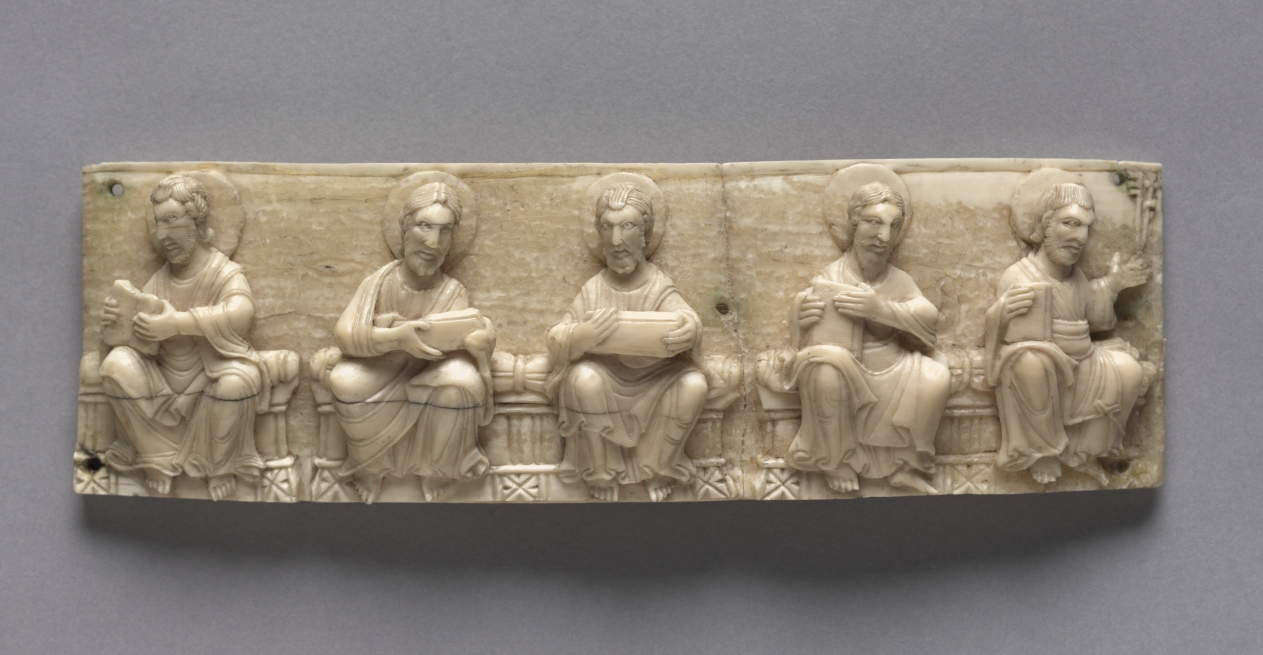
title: Plaque from a Portable Altar Showing Christ and the Apostles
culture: Germany, Lower Rhine Valley, Romanesque period, 11th century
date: 1050–1100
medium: walrus ivory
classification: Ivory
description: This intricately carved ivory panel once decorated the side of a portable altar. One of three plaques, it depicts Christ's apostles and was one of the first major acquisitions of William M. Milliken, the museum's first curator of decorative arts and later director (1930–1958). As Milliken later recalled, the pieces "were immensely intriguing, monumental in scale, even if tiny in size, the Christ in the mandorla could have been enlarged and would have graced the tympanum of a great cathedral."